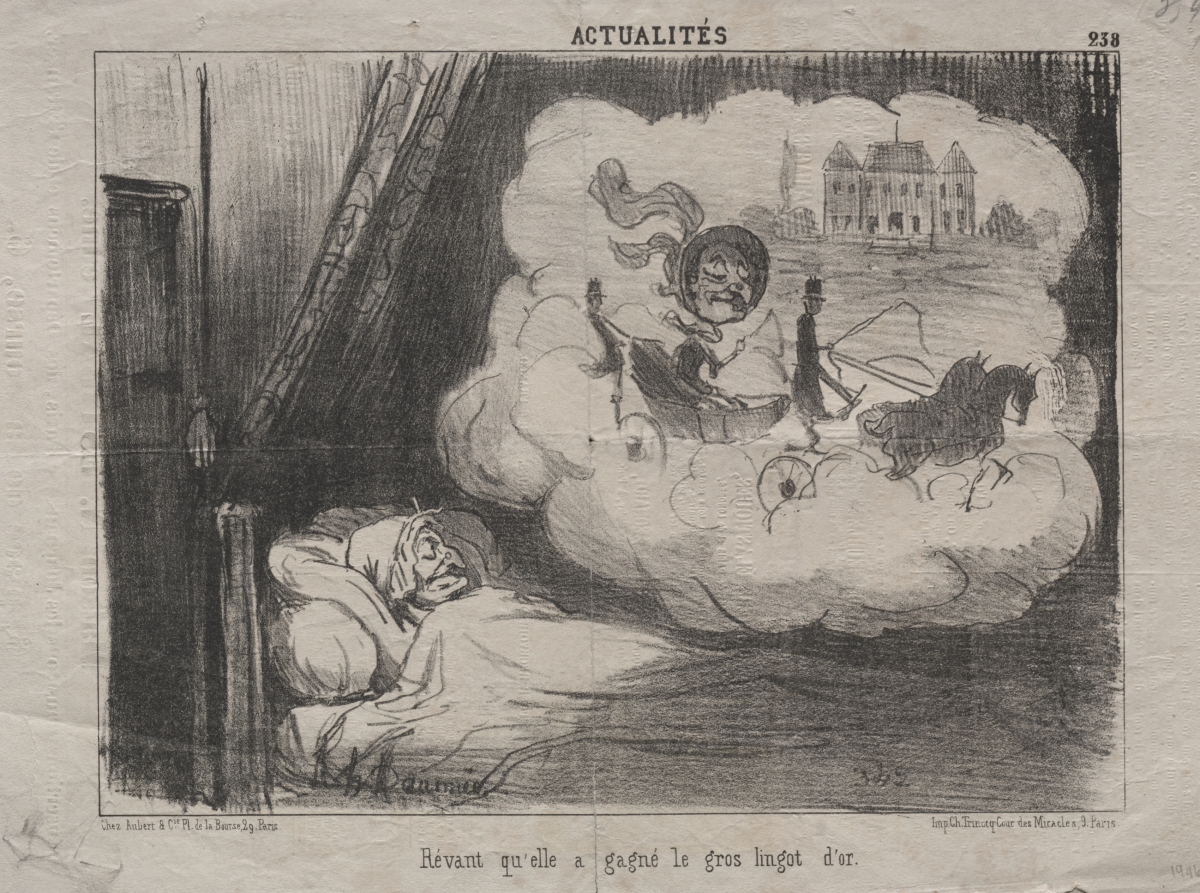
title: Dreaming that she won the big gold bar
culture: France, 19th century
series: News of the Day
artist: Honoré Daumier (French, 1808–1879)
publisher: Aubert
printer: Ch. Trinocq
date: 1851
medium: lithograph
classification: Print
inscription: Upper margin, pencil: 3547 ; Lower margin, pencil: De. vii.2162, state II/II / 1946 / poor imp ; lower margin, printed: Chez Aubert & Cie. Pl. de la Bourse, 29. Paris. / Imp. Ch. Trinocq Cour des Miracles, 9. Paris.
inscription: Above image, printed: ACTUALITÉS. / 238 ; Below image, printed: Révant qu'elle a gagné le gros lingot d'or.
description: This print was published in Le Charivari (October 27, 1851) as plate 238 from the series News of the Day.